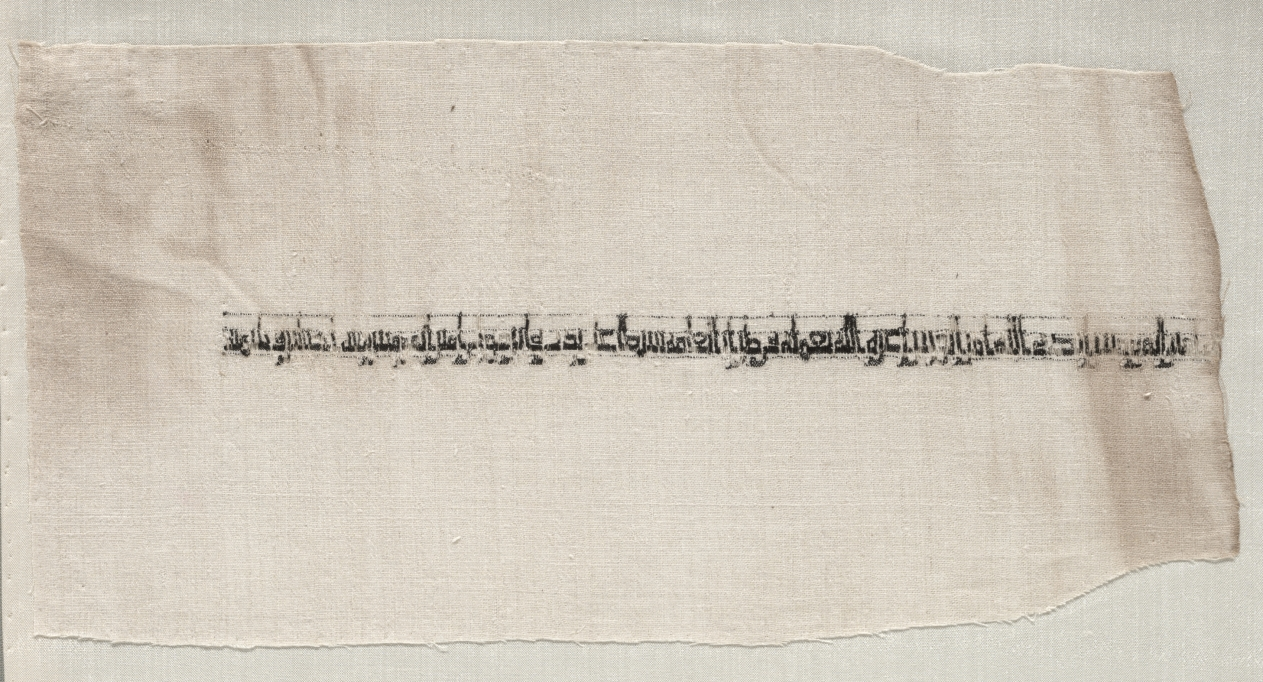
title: Fragment of a Tiraz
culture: Egypt, Shata, Ikhshidid period, Caliphate of al-Muttaqi, AH 331 (A.D. 942-943)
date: 942–943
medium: tabby ground with inwoven tapestry inscription; linen and silk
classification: Textile